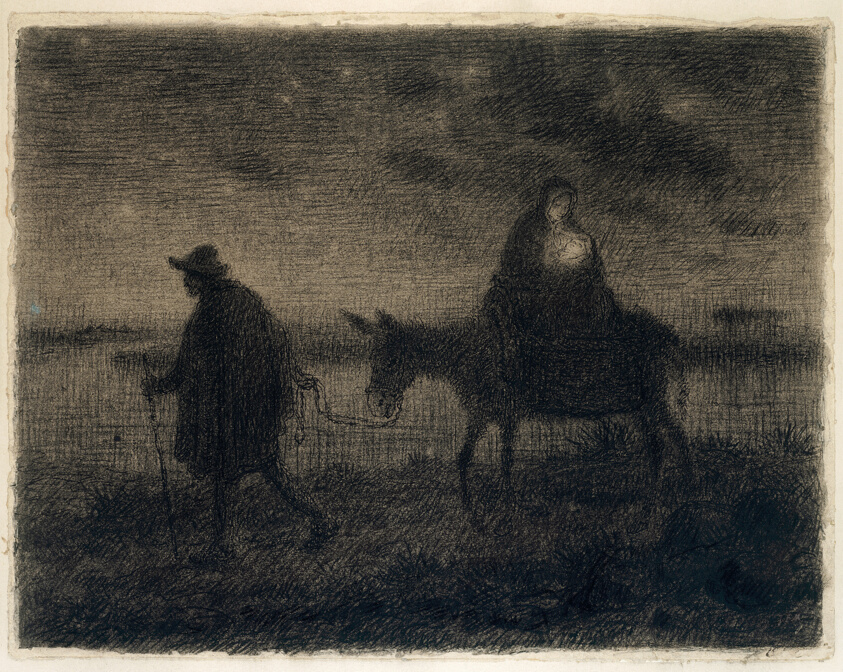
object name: Drawing and Watercolor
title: The Flight Into Egypt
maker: Jean François Millet (French, 1814-1875)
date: c. 1864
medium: Black and brown Conté crayon, with pen and black ink and traces of black pastel, over gray washes, on cream wove paper, edge-mounted on laminated woodpulp board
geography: France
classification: conté crayon; drawings (visual works); prints and drawing